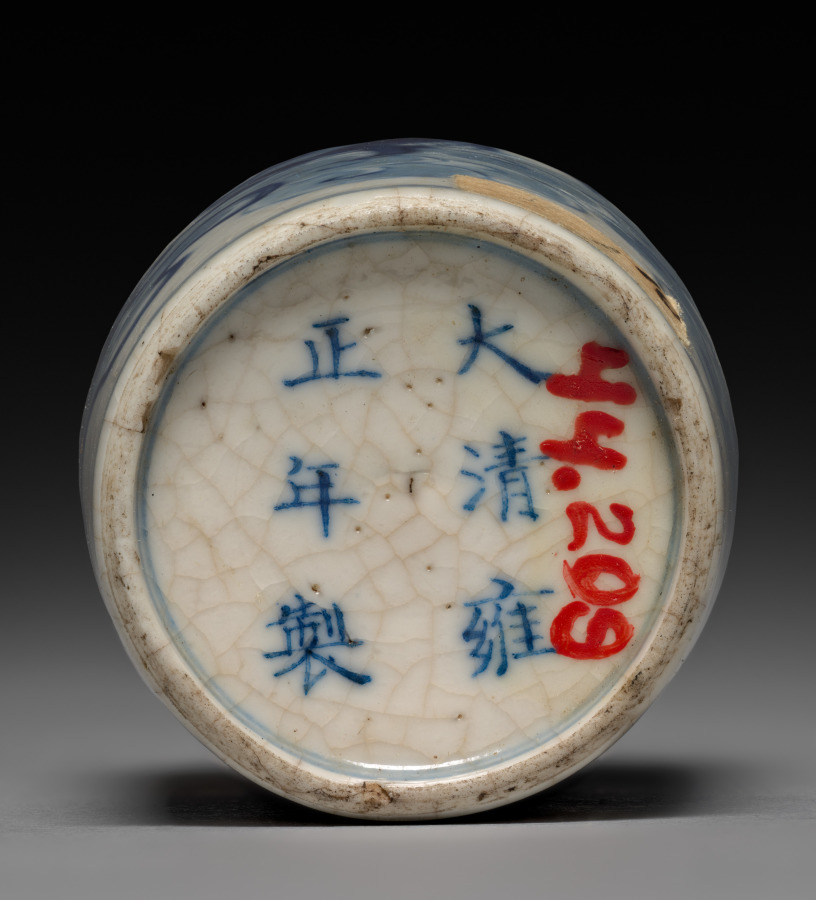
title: Snuff Bottle with Stopper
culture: China, Jiangxi Province, Jingdezhen kilns, Qing dynasty (1644–1911), Yongzheng reign (1722–35)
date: 1723–35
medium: porcelain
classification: Ceramic